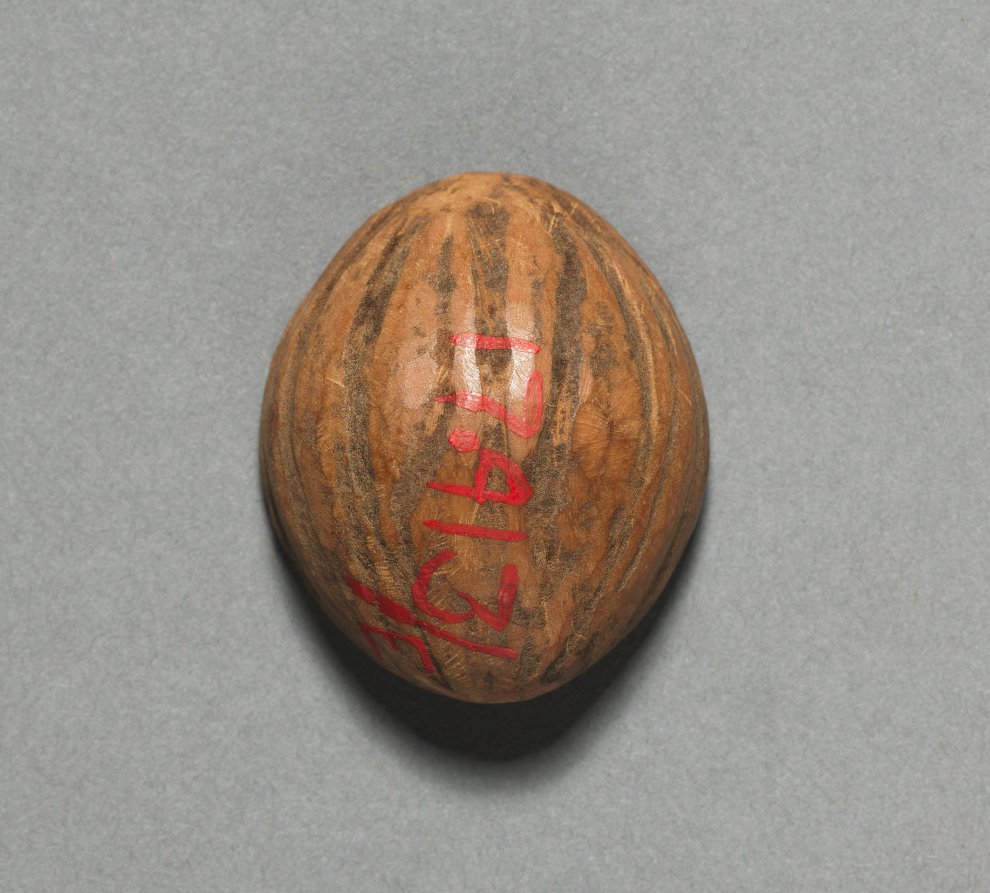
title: Gambling Dice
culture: California, Tulare, Unassigned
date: before 1917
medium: hollow shell, resin, glass beads, mica/seashell fragment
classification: Implements